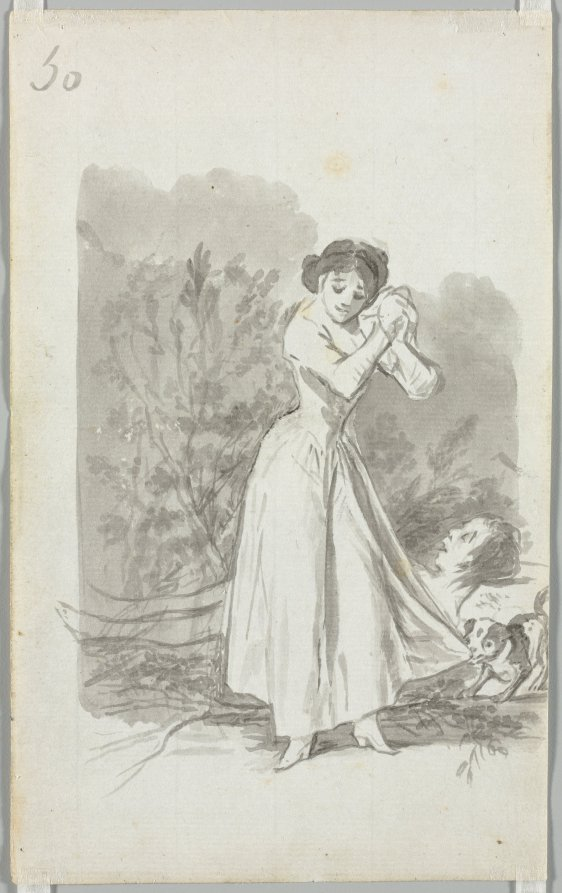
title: Young Woman Wringing Her Hands over a Man's Naked Body, Folio 50 (verso)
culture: Spain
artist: Francisco de Goya (Spanish, 1746–1828)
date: 1796–97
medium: brush and gray and black washes on laid paper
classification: Drawing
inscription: by artist, upper left, in gray wash: 50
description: Among the great figures of the pictorial arts in the West, Francisco de Goya is one of the very few whose work as a graphic artist is arguably even more important than his paintings. Alongside a prodigious output of prints, he created eight sketchbooks of drawings over the course of 30 years. This double-sided sheet comes from the so-called Album B, or Madrid Album, which, like all of them, was scattered throughout the world in public and private collections after his death. The drawings reveal Goya’s powers of invention and observation, and his biting satire. On the recto side of the sheet, a vulgar encounter between a prostitute and a pot-bellied lecher reveals the bluntness of the Goya’s social criticism. The verso drawing is less easily pinned down, though it follows traditional iconography for representations of Saint Margaret of Cortona, a nobleman’s mistress who repented and entered a convent after her lover’s dog led her to his murdered corpse.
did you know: Much of Francisco de Goya's graphic output of drawings and prints was not made public until well after his death.